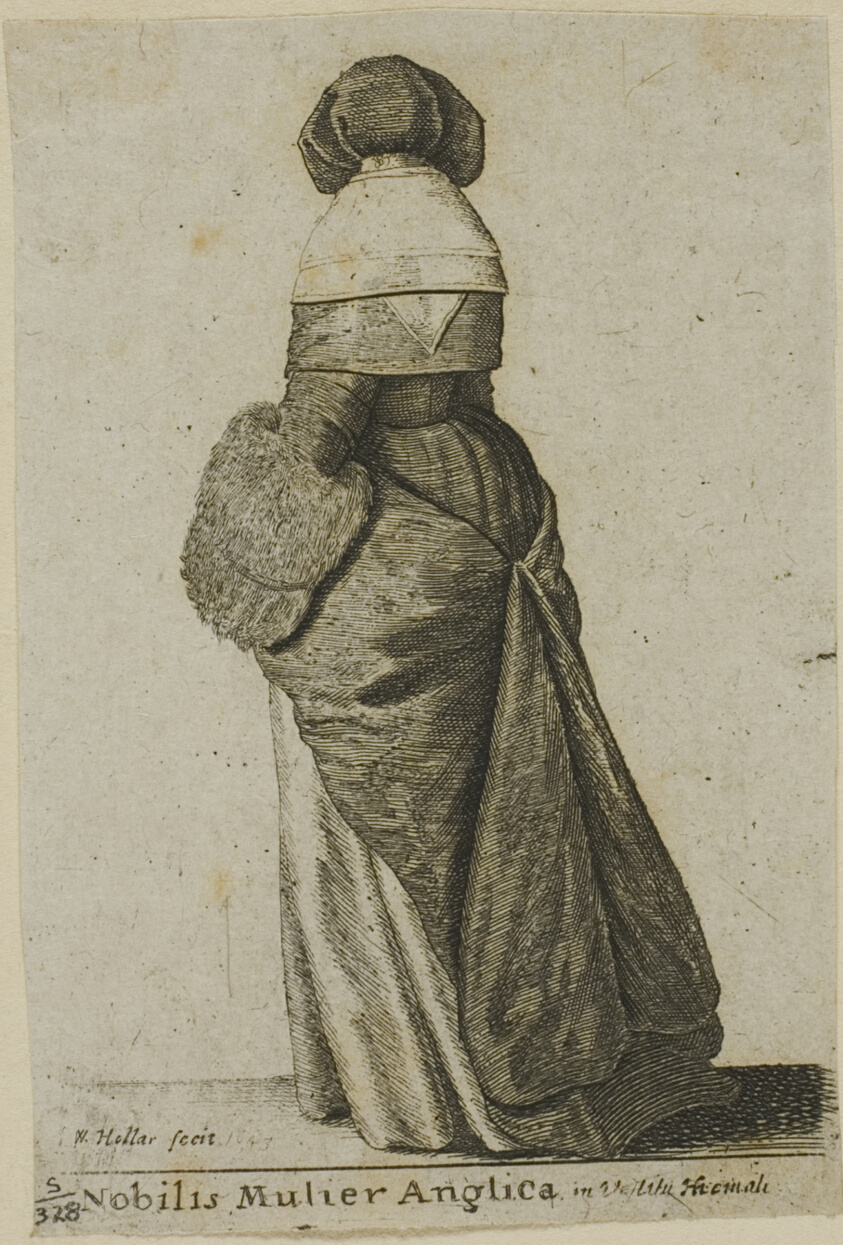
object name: Print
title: English Noblewoman in Winter Clothing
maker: Wenceslaus Hollar (Bohemian, 1607-1677)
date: 1643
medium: Etching on gray Asian paper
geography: Bohemia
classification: etching; print; prints and drawing